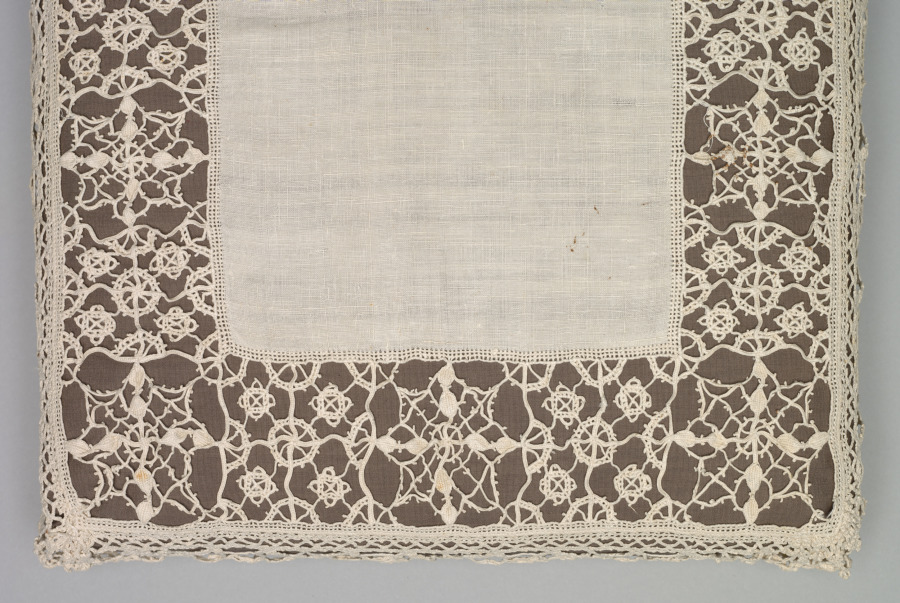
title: Lace Pillow Cover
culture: Italy, Venice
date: 1600s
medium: Plain weave linen (center): plaited bobbin lace edging that mimics needle lace (reticella)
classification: Lace